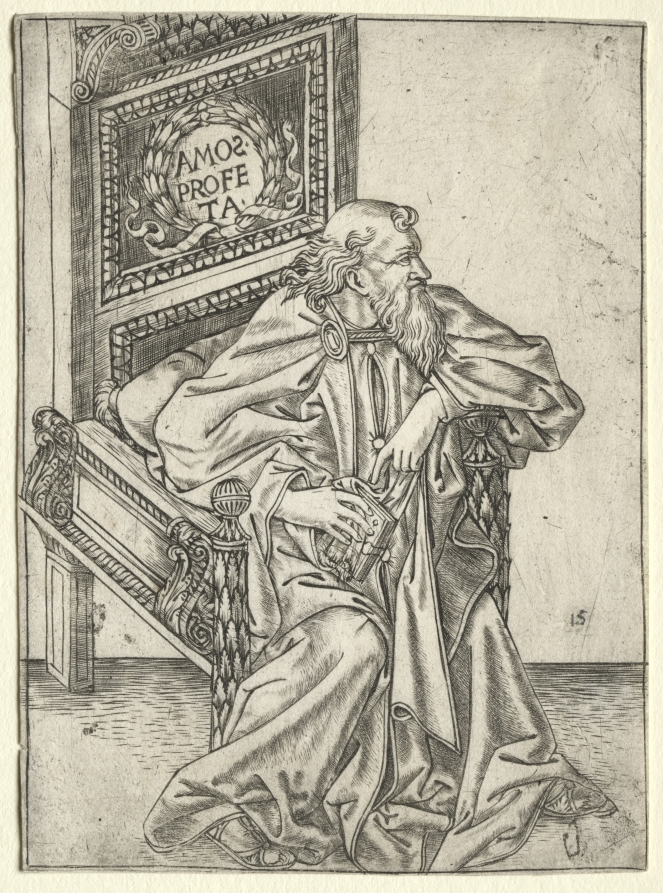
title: The Prophets: Amos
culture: Italy, Florence, 15th century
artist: attributed to Baccio Baldini (Italian, c. 1436–1487)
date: c. 1470–1475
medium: engraving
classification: Print